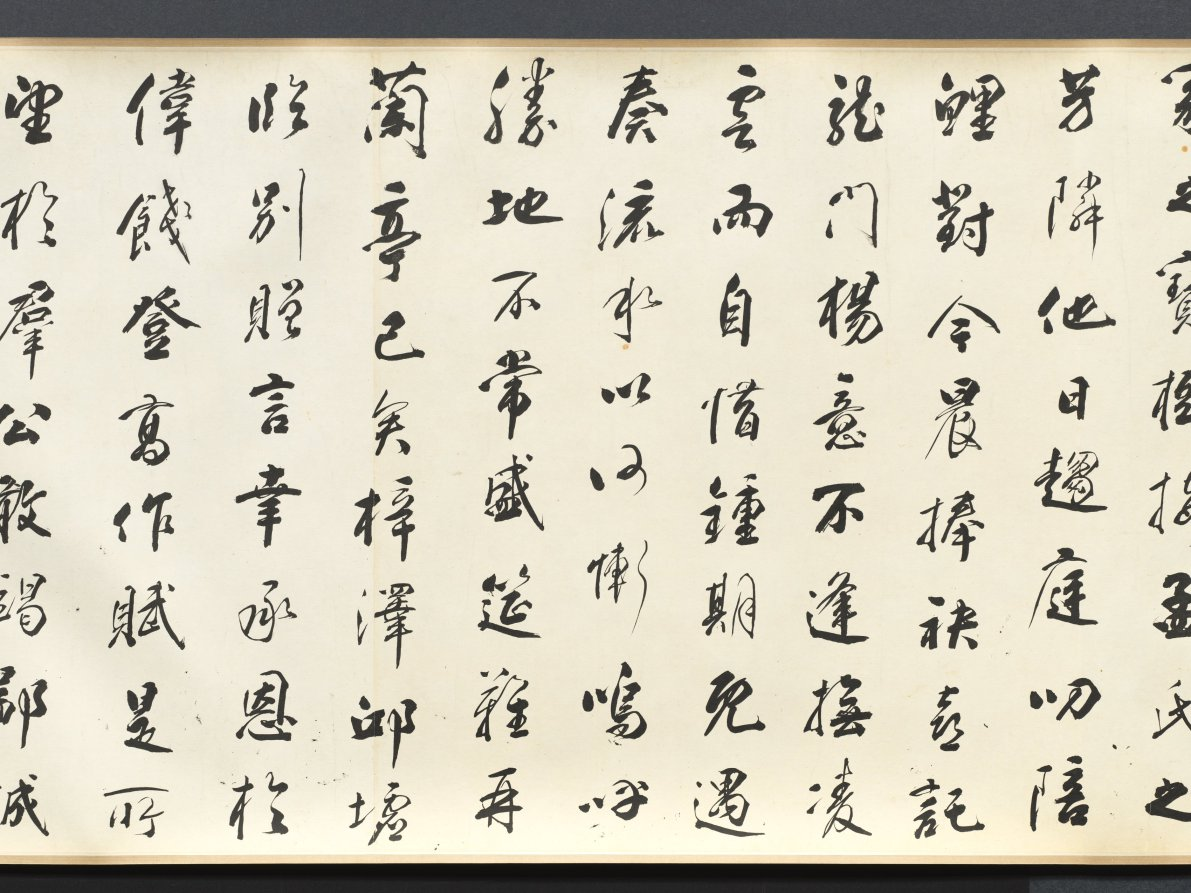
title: Calligraphy in Running Style based on Wang Bo's Essay on Tengwang Pavilion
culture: China, Changbai, Qing dynasty (1644-1911)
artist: Tiebao (Chinese, 1752–1824)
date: 1811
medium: handscroll, ink on paper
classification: Calligraphy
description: A member of the Donggo clan, Tiebao belonged to the Manchu Plain Yellow Banner army. As an official in the Qing court, he endured considerable vicissitude and his career was never smooth. Celebrated as a man of letters, he oversaw the publications of the Manchu military system as well as an anthology of poems by members of the imperial family and other Manchu dignitaries. In calligraphy, he was regarded as the equal of such eighteenth-century luminaries as Liu Yong (1720-1805) and Weng Fanggang (1733-1818). This handscroll is a work of his mature years and is exemplary of his disciplined and highly subtle approach to the art of calligraphy.